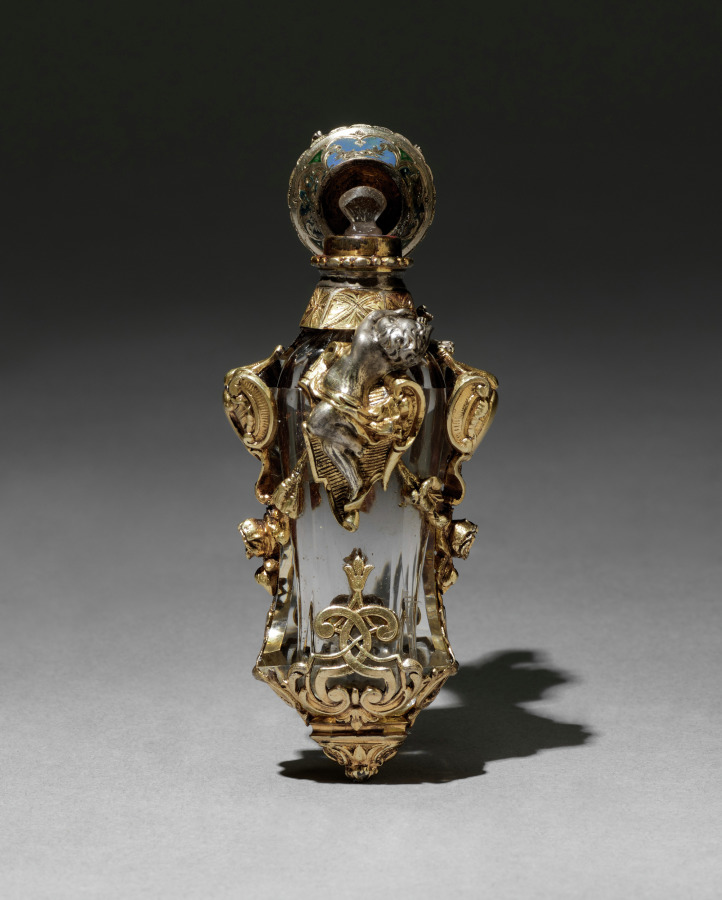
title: Scent Bottle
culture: France, 19th century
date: 1850–1870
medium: glass with enameled silver mounts, partially gilt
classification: Miscellaneous